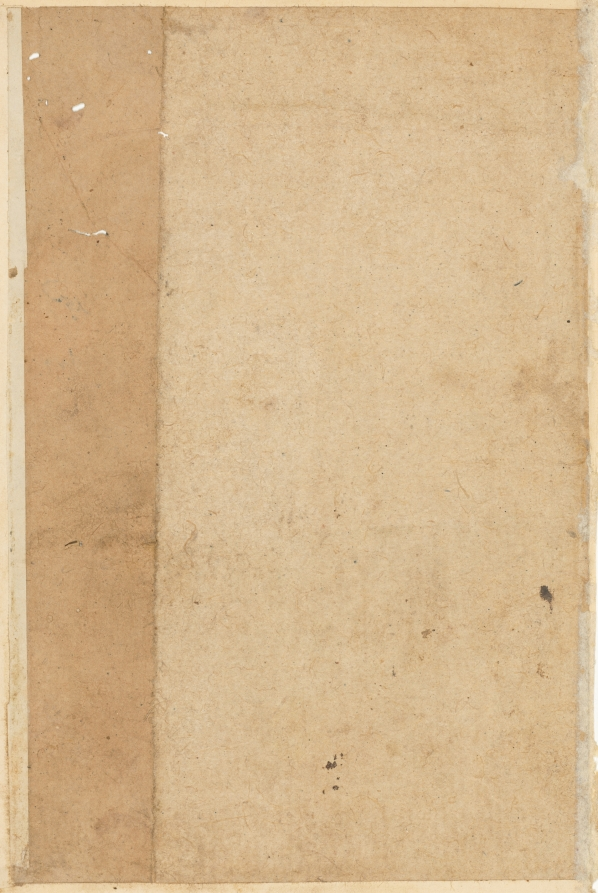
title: Page from Tales of a Parrot (Tuti-nama): blank page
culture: Mughal India, court of Akbar (reigned 1556–1605)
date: c. 1560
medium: gum tempera, ink, and gold on paper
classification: Painting